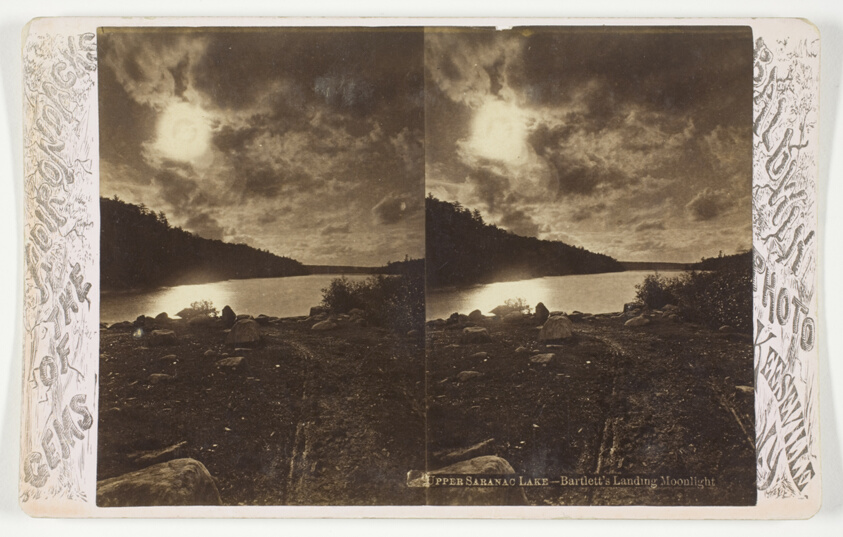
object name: Photograph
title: Upper Saranac Lake - Bartlett's Landing Moonlight, from the series "Gems of the Adirondacks"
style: 19th century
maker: Baldwin Photo (American, active late 19th century)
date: Late 19th century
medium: Albumen print, stereo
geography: New York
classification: photography; photograph; albumen silver print; stereograph (albumen)